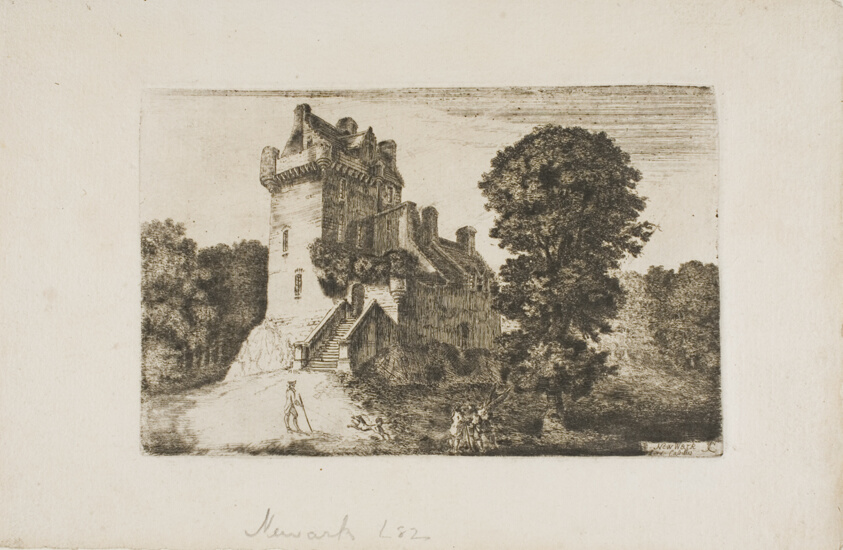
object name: Print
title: Newark Castle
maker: John Clerk of Eldin (Scottish, 1728-1812)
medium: Etching on paper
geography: Scotland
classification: etching; print; prints and drawing